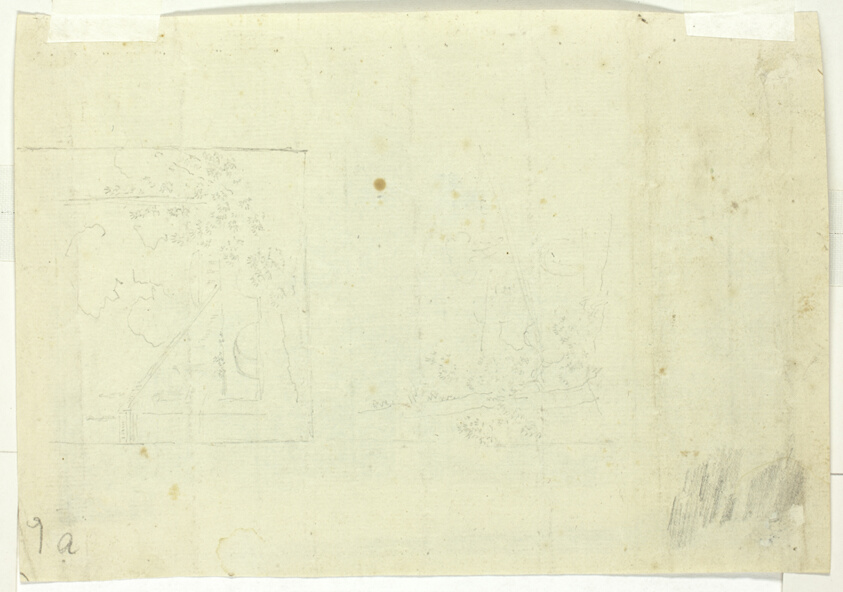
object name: Drawing and Watercolor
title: Two Sketches of a Park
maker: Pierre Antoine Mongin (French, 1761-1827)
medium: Graphite on cream laid paper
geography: France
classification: drawings (visual works); prints and drawing